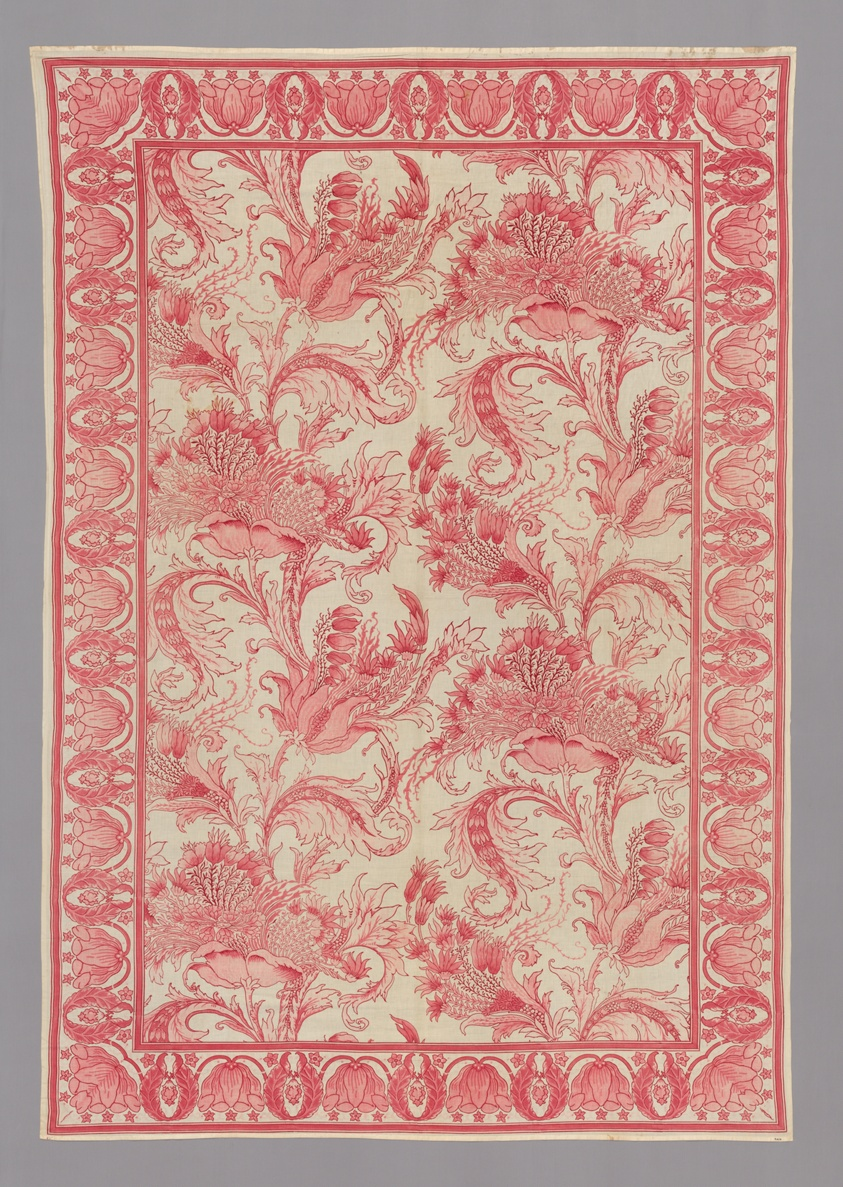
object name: Textile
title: Tablecloth or Bedcover probably titled "Ragged Poppy"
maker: Designed by John Scarratt Rigby (English, 1833–1914); Produced by G.P. & J. Baker for Liberty & Co., founded 1875; England, London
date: 1902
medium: Cotton, plain weave; block printed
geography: London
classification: textile; weaving - printed